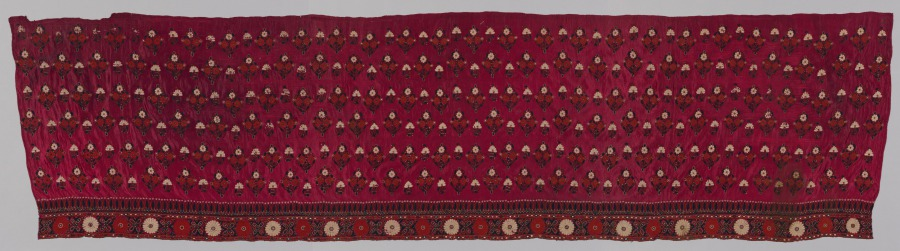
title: Skirt (?)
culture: Western India, Gujarat, Kachchh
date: 1800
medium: silk thread on silk ground, embroidery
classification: Embroidery